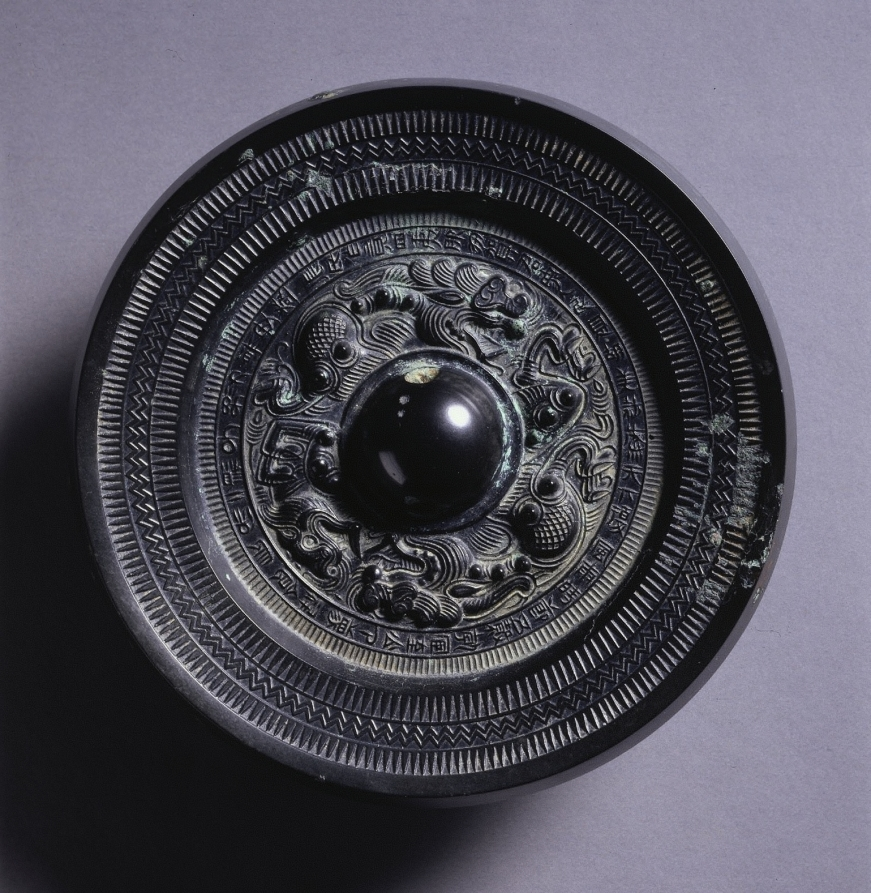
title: Mirror with Two Dragons and a Tiger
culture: China, Three Kingdoms (221–280 CE)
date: 200s CE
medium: bronze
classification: Metalwork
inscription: 張氏作鏡四夷服，多賀君家人民息。 胡羌殄減天下復，風雨時節五殼熟。 官至公卿蒙祿食，長保二親子孫力。 樂毋極。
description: Inscription: I, Master Zhang, produced this mirror, When alien tribes in four corners were being subjugated. Let us praise our Lord, for the people are given respite. After quelling the Hu and Qiang [tribes], he will restore peace on earth. May you reach the high office and receive your just reward. May you [gain the power to] protect your parents and descendants from harm. May your joy be endless.